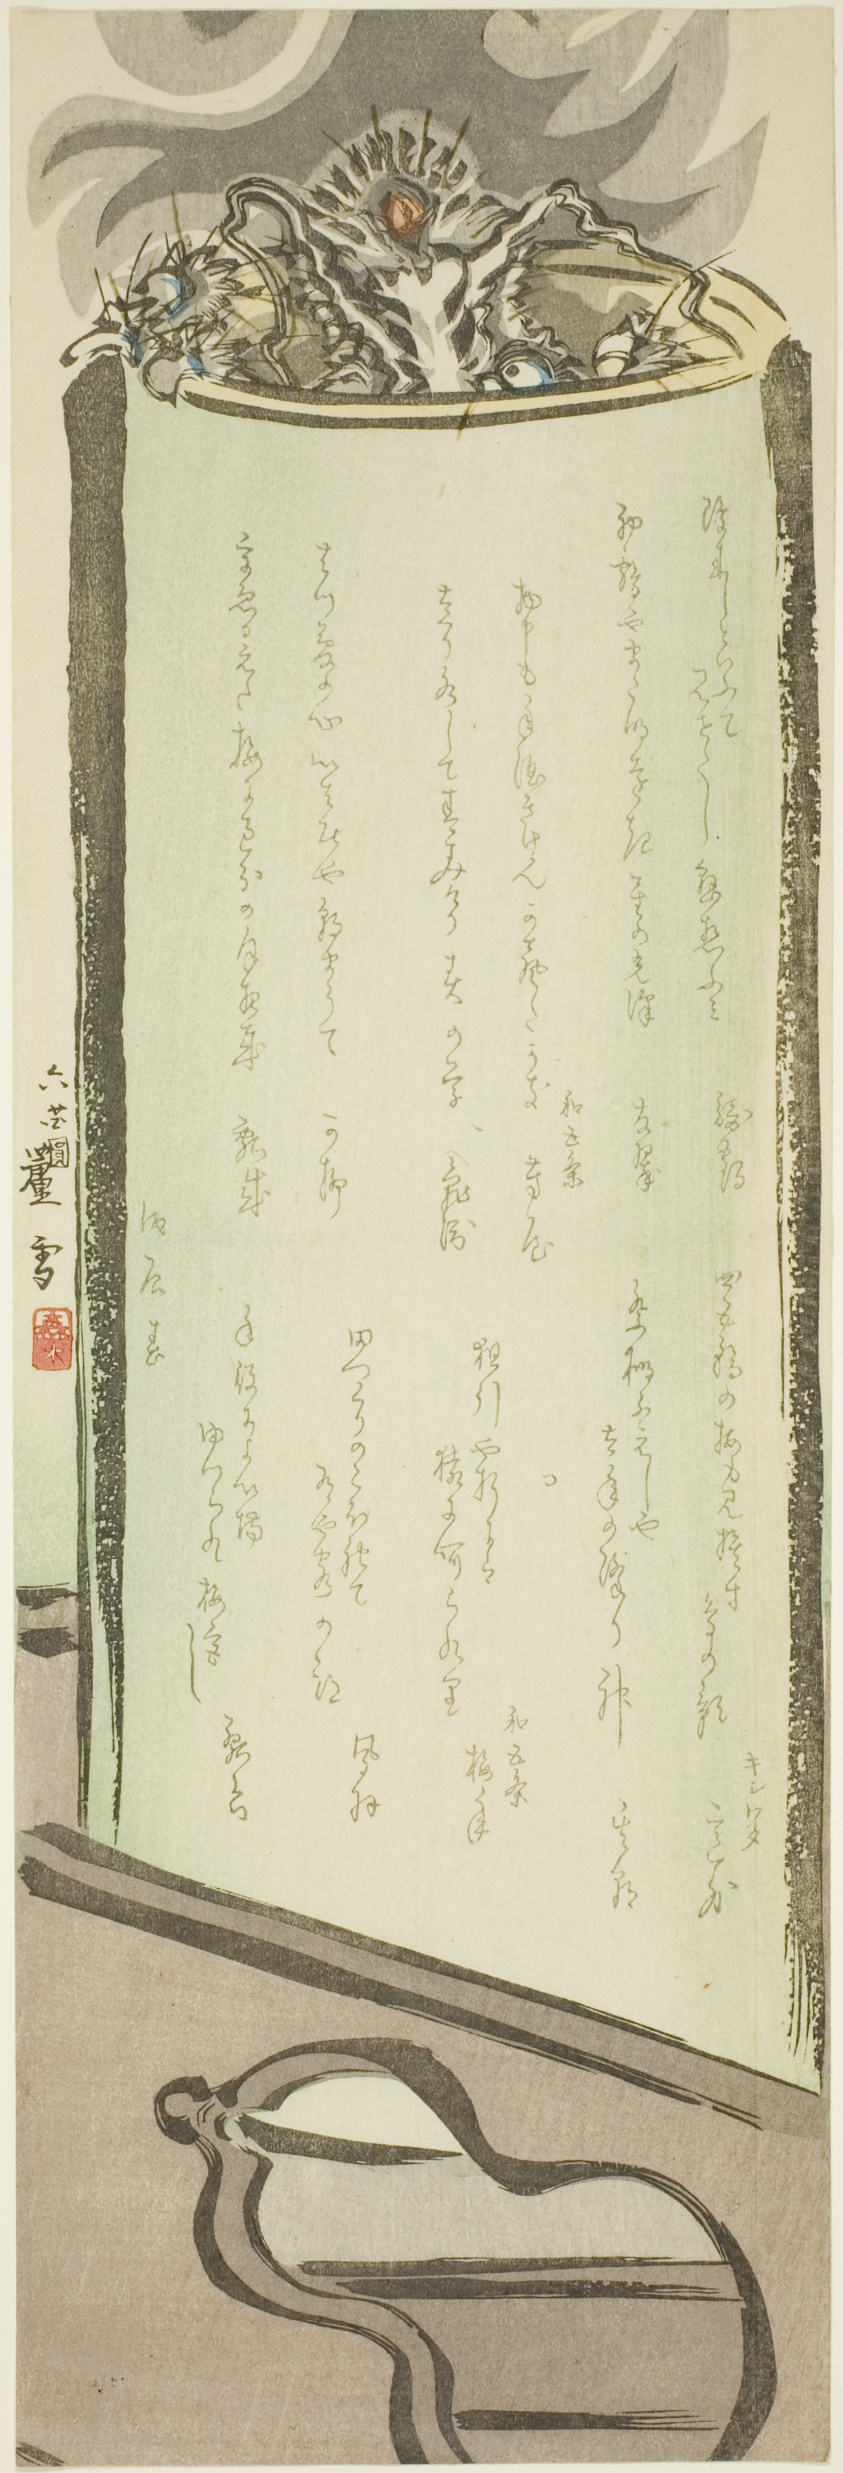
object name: Print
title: Smoking Dragon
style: Japanese (culture or style)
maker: Moriki Rosetsu (Japanese, active 19th century)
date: 1868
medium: Color woodblock print; surimono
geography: Japan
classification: woodblock print; print; asian art